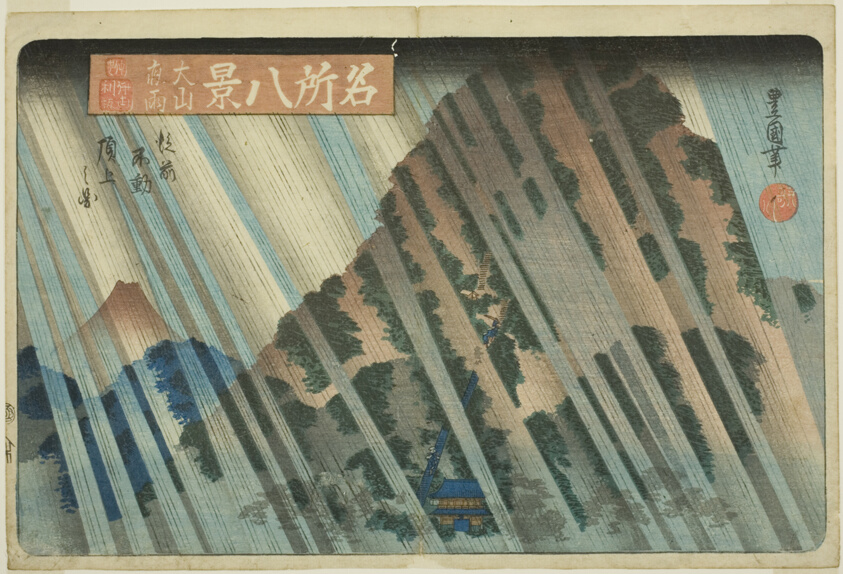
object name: Print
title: Night Rain at Oyama, View of the Summit Above the Former Fudo Temple (Oyama yau, juzen Fudo yori chojo no zu), from the series "Eight Views of Famous Places (Meisho hakkei)"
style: Japanese (culture or style)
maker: Utagawa Toyoshige (Toyokuni II) (Japanese, 1777-1835)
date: c. 1833/34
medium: Color woodblock print; oban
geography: Japan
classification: woodblock print; print; asian art